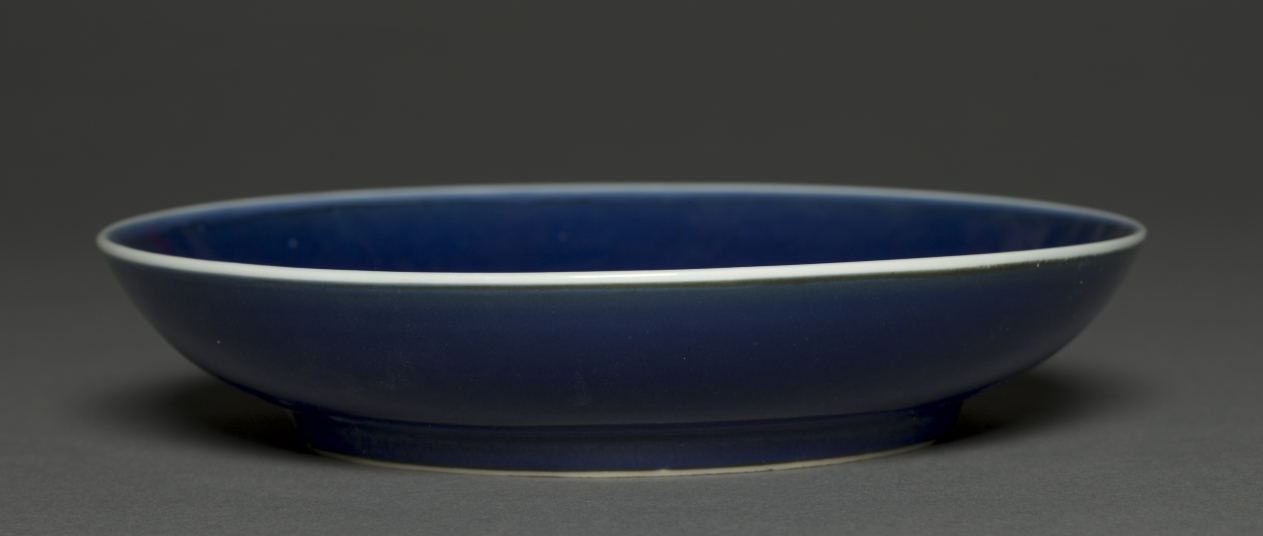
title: Dish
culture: China, Jiangxi province, Jingdezhen kilns, Ming dynasty (1368-1644), Xuande mark and period (1425-1435)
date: 1426–35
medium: porcelain with blue glaze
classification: Ceramic